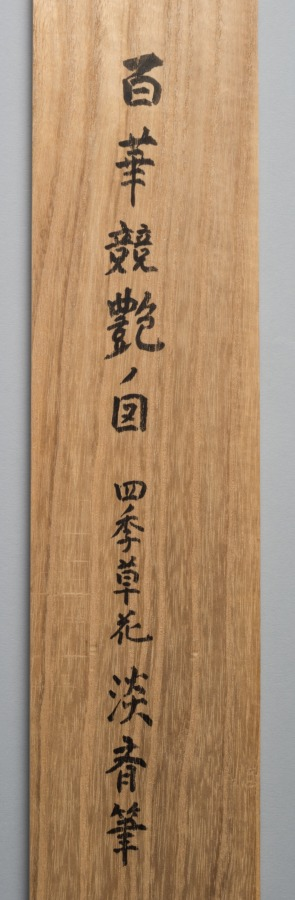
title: Vase of Flowers with Grasshopper, Marine Life, and Garden Rock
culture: Japan, Meiji period (1868–1912)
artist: Okabe Ko (Japanese)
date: late 1800s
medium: hanging scroll; ink and color on silk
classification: Painting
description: A great interest in Western scientific studies developed in Japan during the late Edo period (1615-1868) and into the Meiji era (1868-1912). One outcome of this phenomenon in the visual arts was the detailed portrayal of plant, animal, and marine life. This painting is an assemblage of objects carefully observed from nature, but not usually seen together.